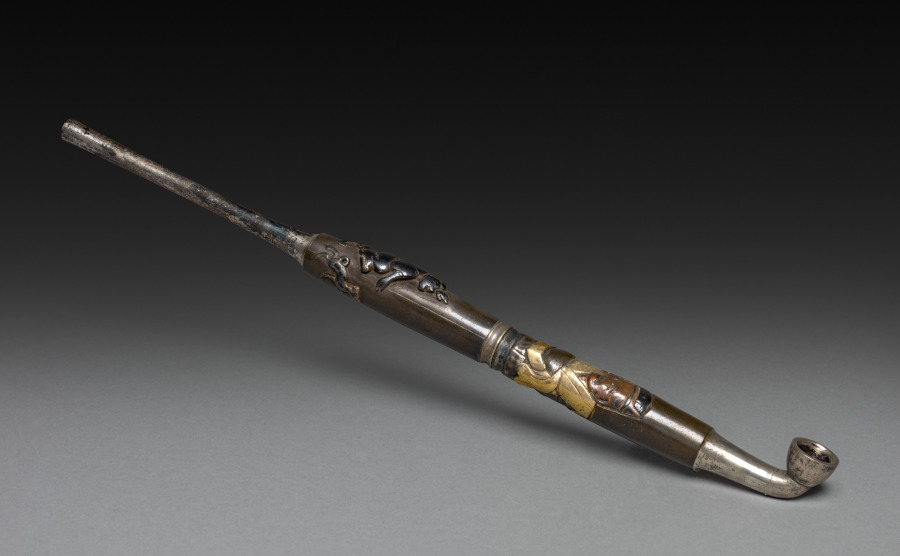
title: Tobacco Pipe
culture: Japan, Edo period (1615–1868)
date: 1700s to mid-1800s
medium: bamboo and metal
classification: Miscellaneous